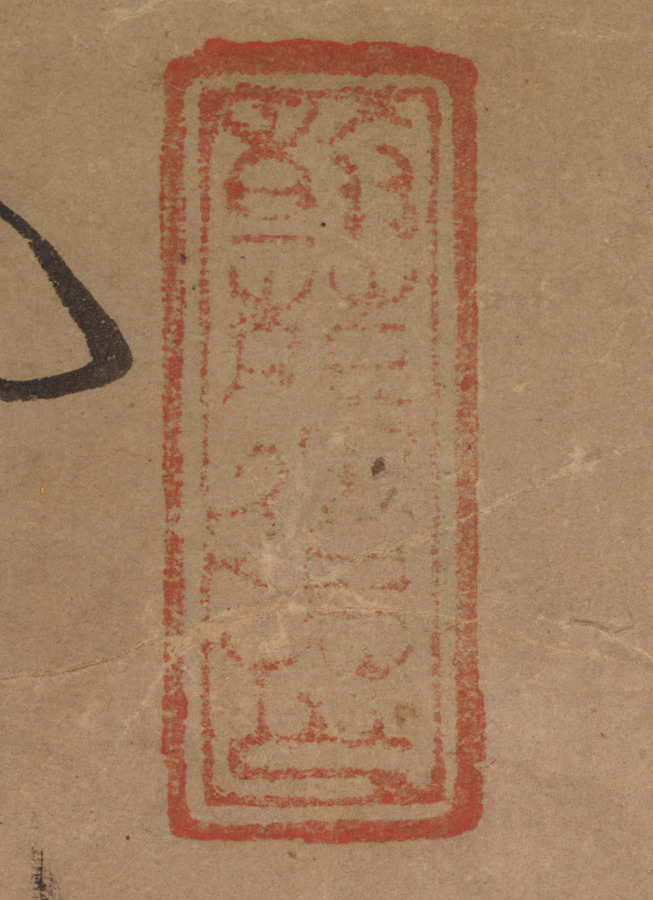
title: Portrait of Sugawara Michizane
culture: Japan, Muromachi period (1392–1573)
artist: Yōgetsu (Japanese, active late 1400s to early 1500s)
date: late 1400s–early 1500s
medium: hanging scroll; ink and color on paper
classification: Painting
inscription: four-line inscription signed "Sakugen Shūryō" (1501-1579) accompanied by two seals unread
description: Sugawara Michizane (845–903) was a Kyoto aristocrat who died in exile in Dazaifu in Japan’s southern island of Kyushu, having been slandered at court. His vengeful spirit was later pacified by the construction of shrines in his name. His image was incorporated into the repertoire of Zen Buddhist figure painting, which included bodhisattvas, Daoist immortals, and other enlightened beings. Eminent monk Sakugen Shūryō (1501–1579) inscribed this work, which was painted by monk-painter Yōgetsu of Kyushu, who traveled east to study either in Kyoto or Kamakura. The Chinese-style poem is an ode to Michizane in his guise as the deity Tenjin.